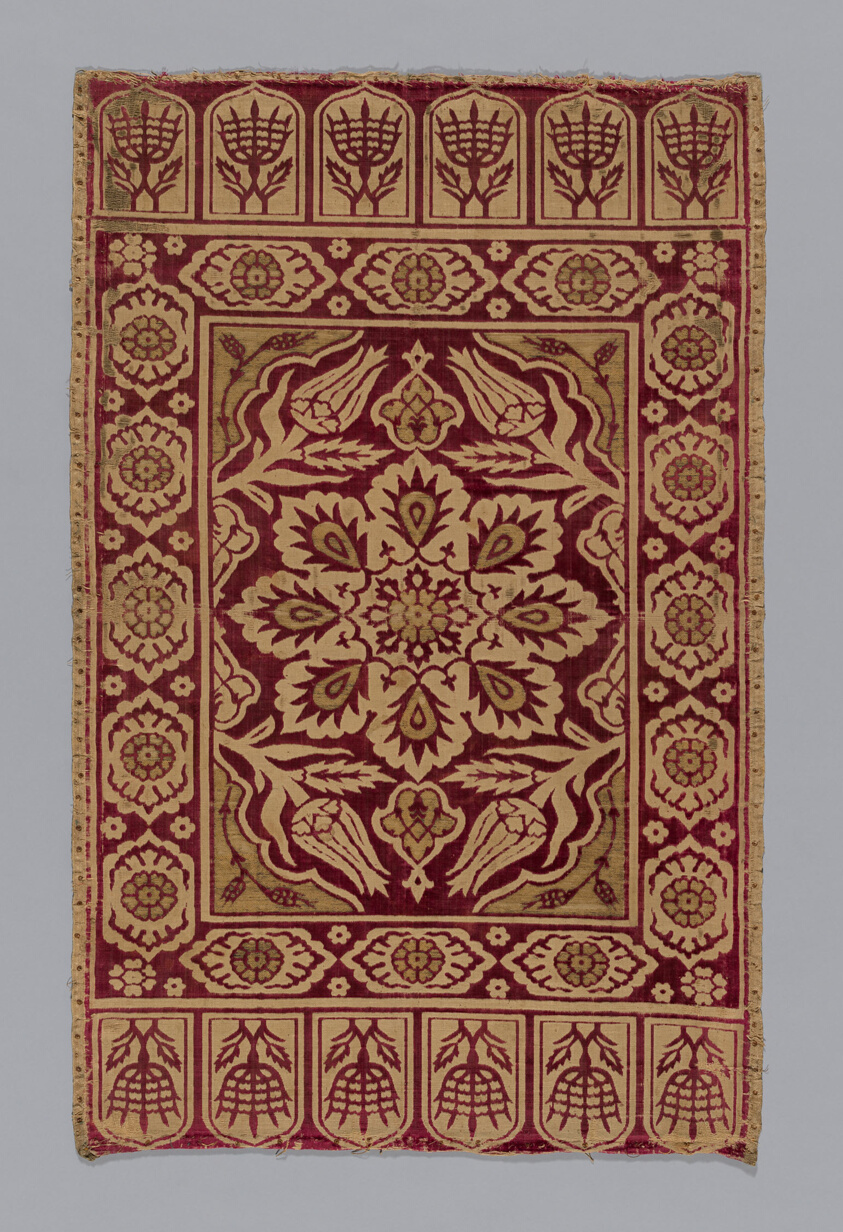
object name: Textile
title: Cushion Cover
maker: Turkey, Bursa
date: 1601/50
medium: Velvet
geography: Turkey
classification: textile; weaving - velvet